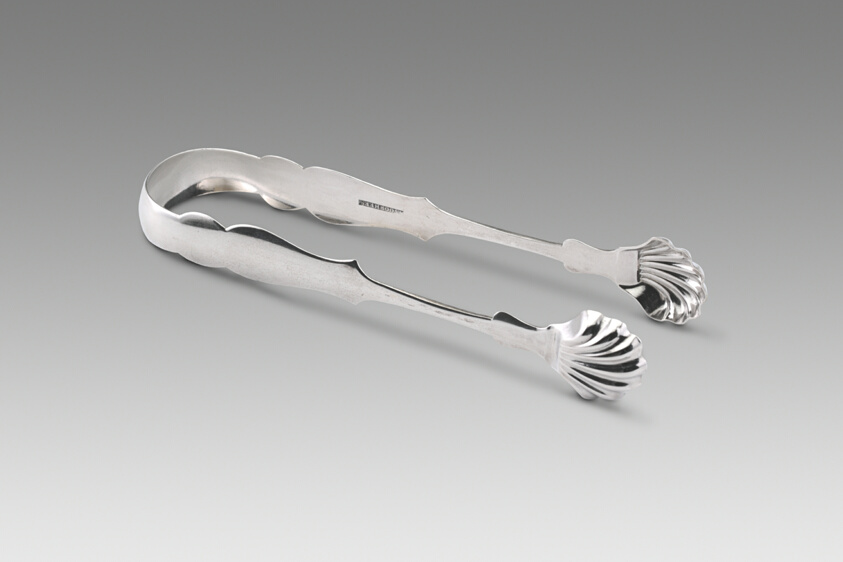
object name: Metalwork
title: Sugar Tongs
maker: Abraham Voorhees; American, 1817–1892; New Brunswick, New Jersey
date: 1835–40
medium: Silver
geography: New Brunswick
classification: utensil for serving food; silver; utensil; american decorative arts; american arts; decorative arts